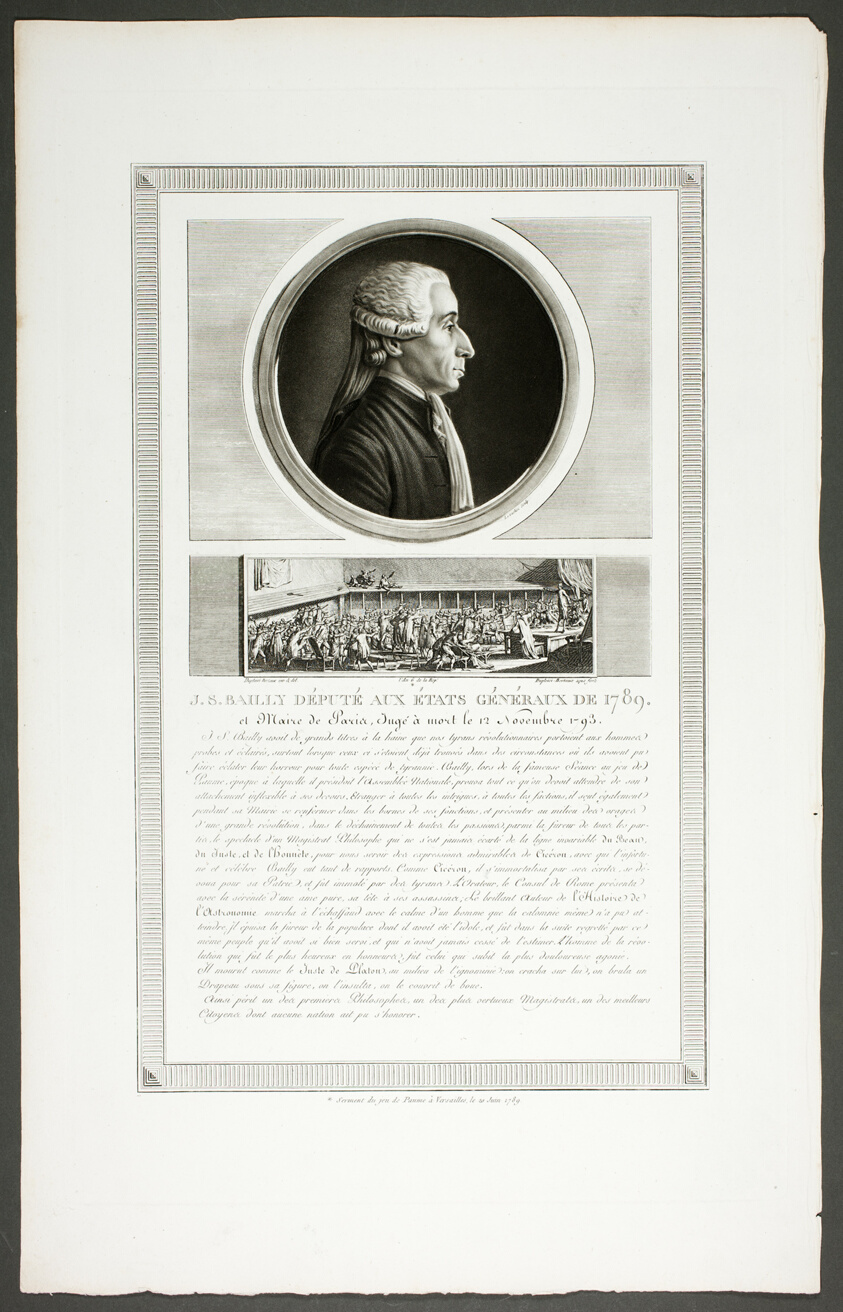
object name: Print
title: J. S. Bailly, Deputy States General, from the series Tableaux historiques de la révolution française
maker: Charles François Gabriel Levachez, and Son (French, 18th and 19th century); Jean Duplessi-Bertaux (French, 1747-1819)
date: 1798–1804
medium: Aquatint and etching, with engraving, on ivory wove paper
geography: France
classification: etching; print; prints and drawing